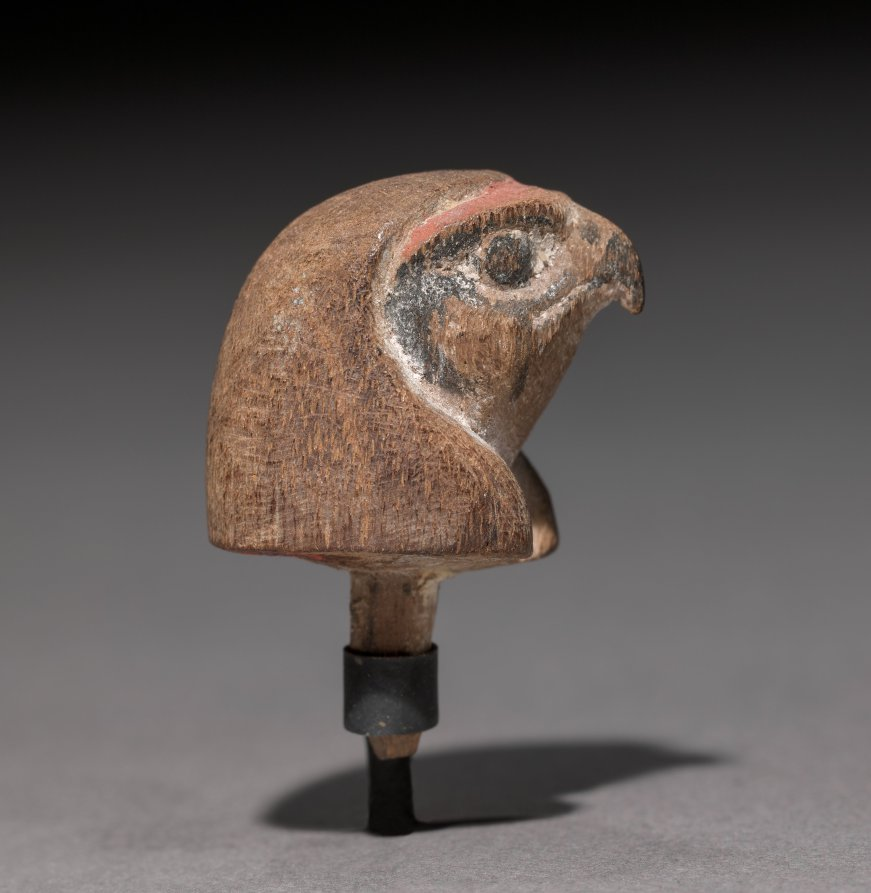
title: Falcon Head Steering Oar Butt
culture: Egypt, Middle Kingdom (2040–1648 BCE)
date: 2040–1648 BCE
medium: wood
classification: Funerary Equipment